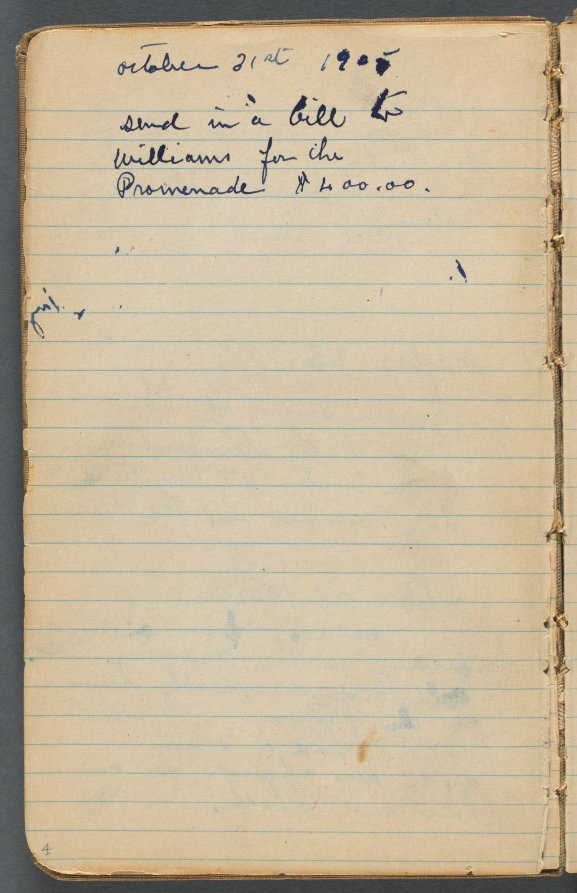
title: Sketchbook, page 004: Notes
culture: America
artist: Maurice Prendergast (American, born Newfoundland [now Canada], 1858–1924)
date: 1905–10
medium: graphite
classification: Bound Volume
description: This sketchbook contains 69 pages of drawings, a diary largely devoted to the state of the artist's health, and a three-page discourse on the nature of genius and ideas.